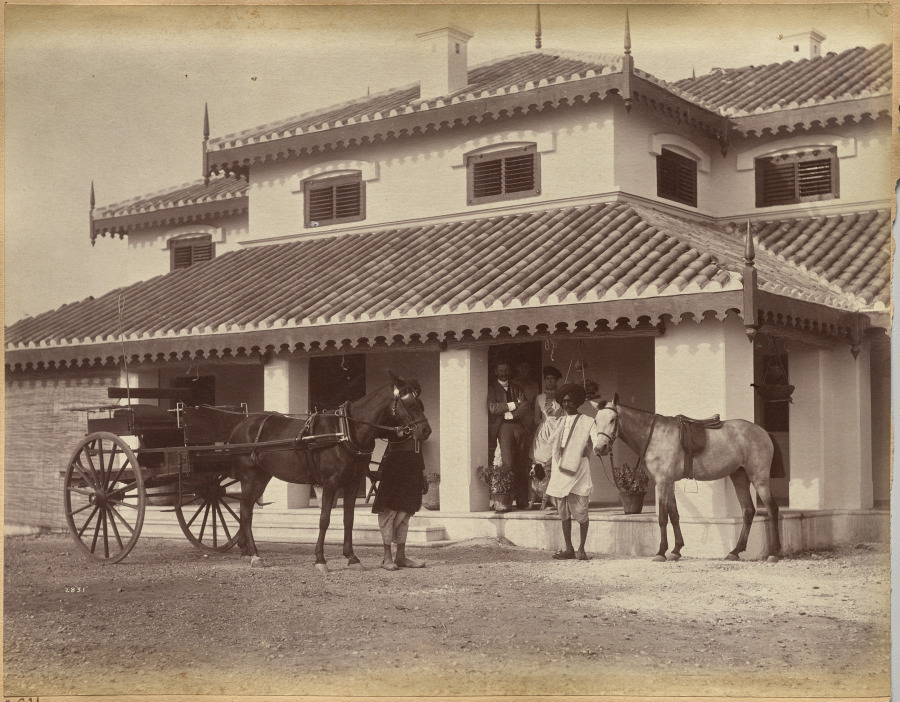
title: Mr. MacNull, Jhansi (verso)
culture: India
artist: Raja Deen Dayal (Indian, 1844–1905)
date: c. 1882–87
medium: albumen print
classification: Photograph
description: These photographs are part of an album, now disassembled, of around 105 photographs taken in India between 1885 and summer 1887 that provide glimpses into the lives of the British colonial elite and royal and upper-class Indians. The museum holds another group of 37 pictures from this album (2016.266), which was probably commissioned by a British civil servant visiting or working in India around 1888 as a personal souvenir of his experiences there.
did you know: Raja Deen Dayal is regarded now, and was considered during his lifetime, to be India’s most important 19th-century photographer.